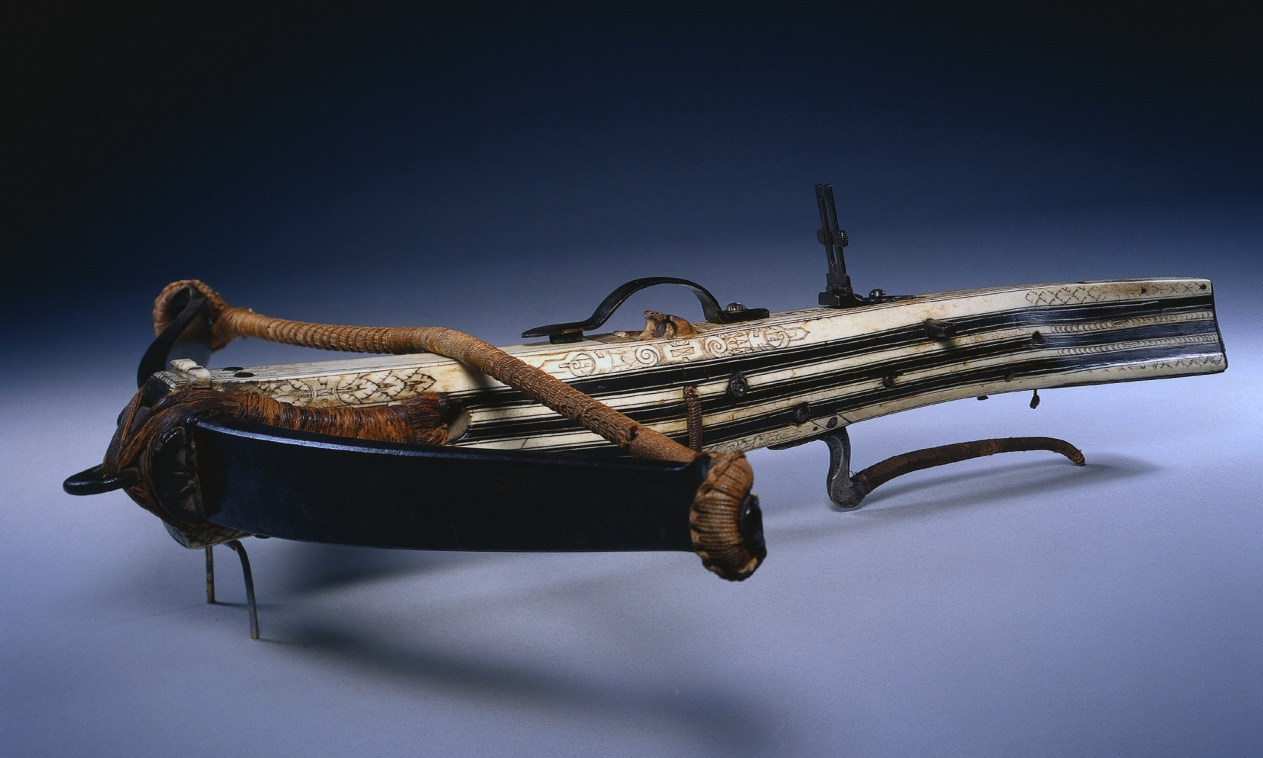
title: Crossbow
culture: Germany, early 17th Century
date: early 1600s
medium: wood, stag horn, flax cord and steel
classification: Arms and Armor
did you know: The decoration of four strips of inlaid horn was quite rare.